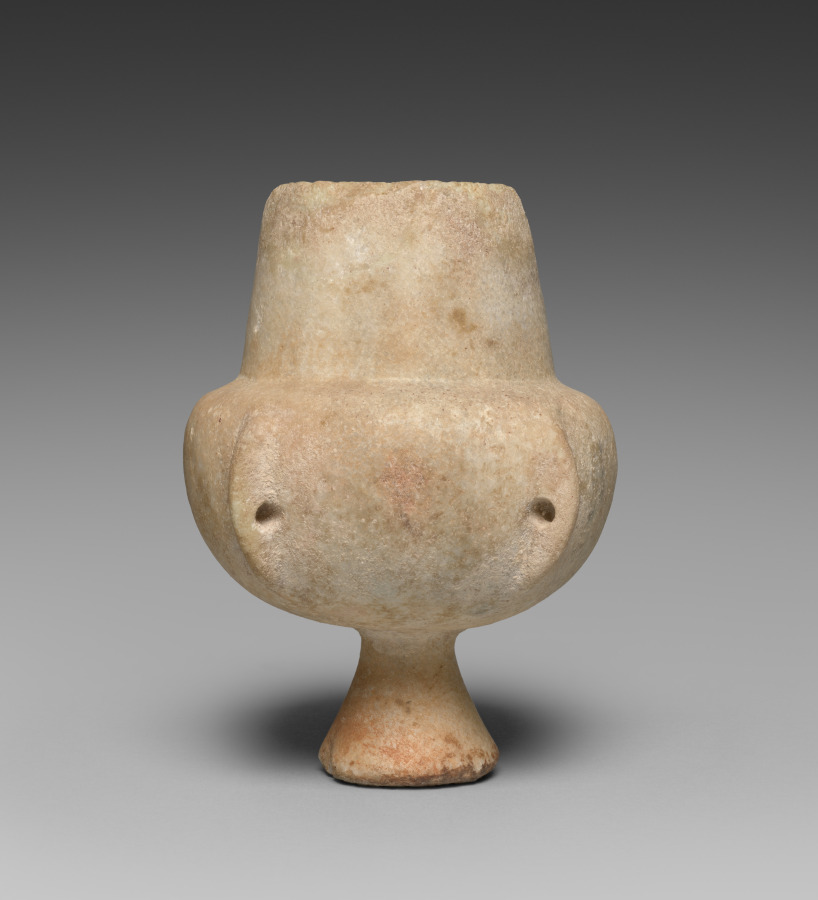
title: Kandila (Collared Jar with Conical Foot)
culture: Greece, Cycladic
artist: Master A (Greek)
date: 3000–2950 BCE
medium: marble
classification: Sculpture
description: Kandila, the modern Greek word used by archaeologists for Early Cycladic stone jars like this one, also refers to a type of hanging oil lamp, similar in shape but made of metal and still used in some Greek Orthodox churches. Despite this name and the formal similarity, the primary function of the prehistoric kandila remains uncertain. The holes drilled through each of its four lugs may have been used for hanging or to secure a lid.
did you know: "Cycladic" refers to a group of Aegean islands where vessels like this were made.